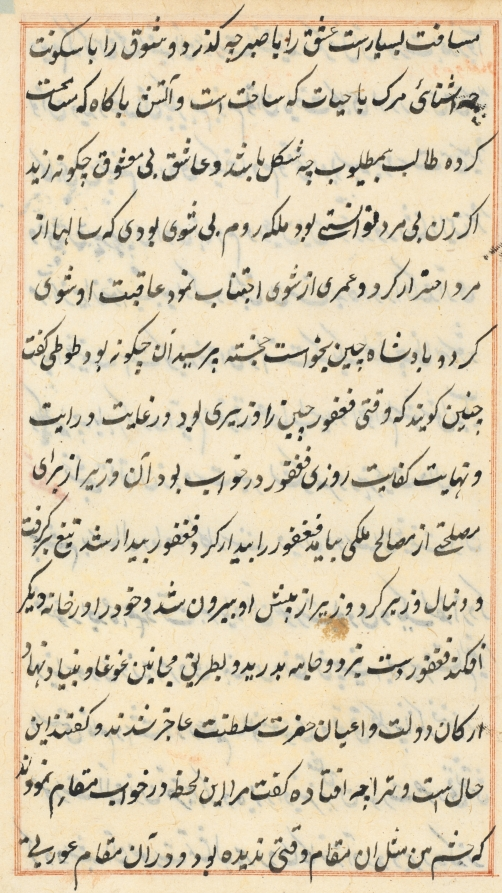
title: Page from Tales of a Parrot (Tuti-nama): text page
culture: Mughal India, court of Akbar (reigned 1556–1605)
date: c. 1560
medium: gum tempera, ink, and gold on paper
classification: Painting